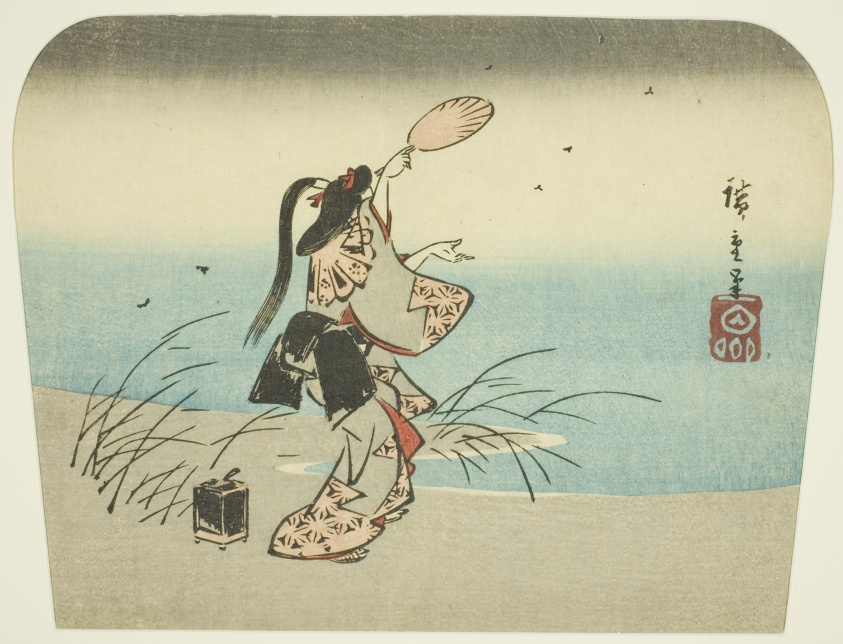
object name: Print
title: Catching fireflies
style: Japanese (culture or style)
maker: Utagawa Hiroshige 歌川 広重; Japanese, 1797-1858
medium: Color woodblock print; uchiwa-e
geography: Japan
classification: woodblock print; print; asian art